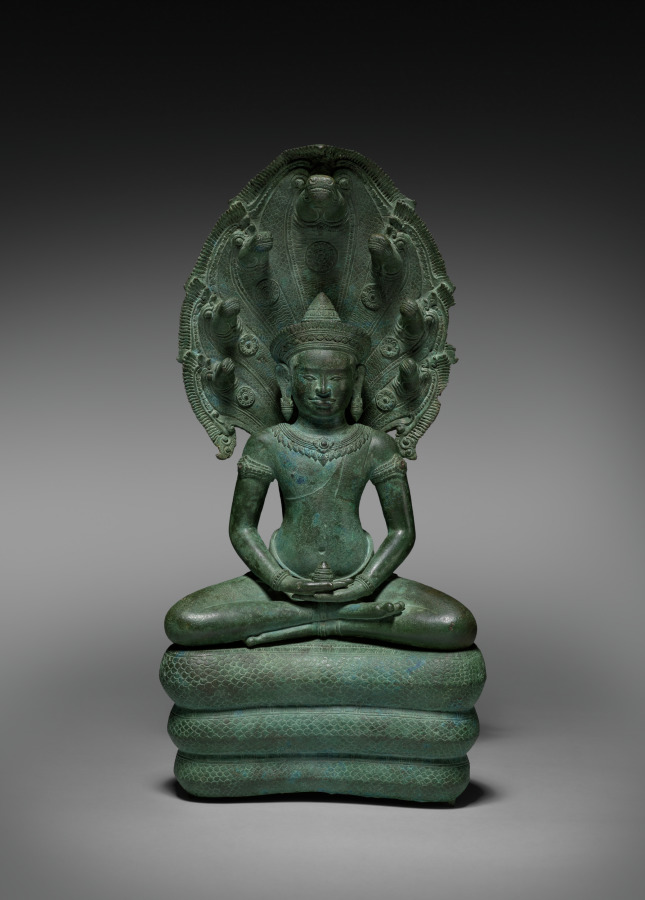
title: Naga-Enthroned Buddha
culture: Cambodia, Angkor, Angkor Wat Period, 12th century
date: 1100s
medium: bronze with traces of gilding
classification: Sculpture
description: Jayavarman VII, who built the great royal temple at Banteay Chhmar, linked himself with the image of the Buddha seated on a serpent, or naga, as the divine form under which he would be honored. During his reign, the naga-enthroned Buddha became a ubiquitous image for veneration, often set up together with Lokeshvara, who was associated with his father, and Prajnaparamita, the form under which his deceased mother was honored. Lokeshvara is the powerful enlightened being of compassion, while Prajnaparmita is the goddess who personifies wisdom. King Jayavarman VII, therefore, presented himself as the enlightened Buddha, the product of the union of Compassion and Wisdom, supported and glorified by the naga, which refers to the Khmer people. Images of the naga-enthroned Buddha have been found at Banteay Chhmar, both in architectural relief sculpture and as icons in the round. After the death of Jayavarman VII, followers of other forms of Buddhism (for example, Theravada) that became prevalent in Cambodia changed the meaning of the naga-enthroned Buddha and reinterpreted the image to refer to a scene from the historical Buddha’s life story in which a serpent protected him from a flood. The crowned and bejeweled aspect of this Buddha, though, indicates that it is another kind of transcendent figure. In his lap his hands are in a posture of meditation, holding what appears to be an offering of ceremonial rice referring to the hope that he will ensure the prosperity of the land.